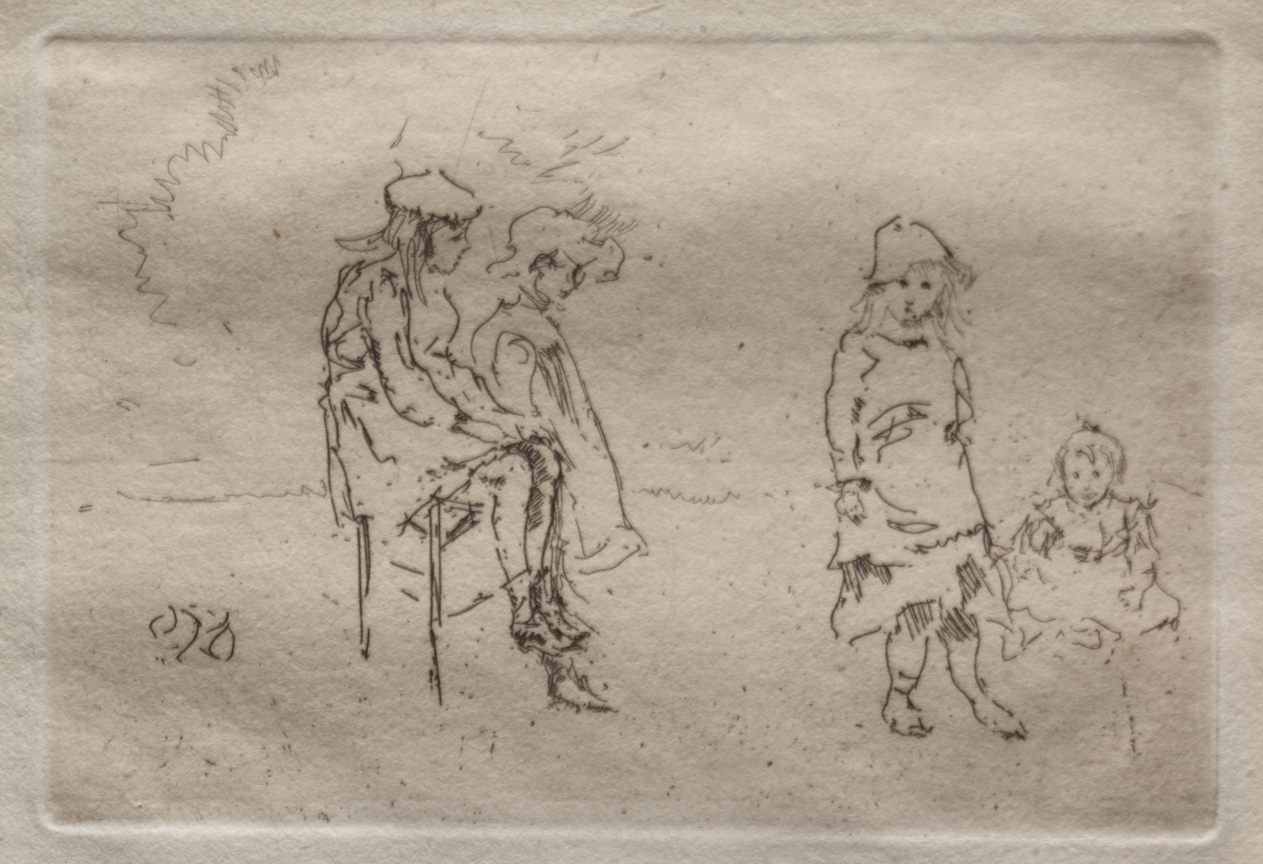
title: The Menpes Children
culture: America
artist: James McNeill Whistler (American, 1834–1903)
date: 1887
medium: etching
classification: Print